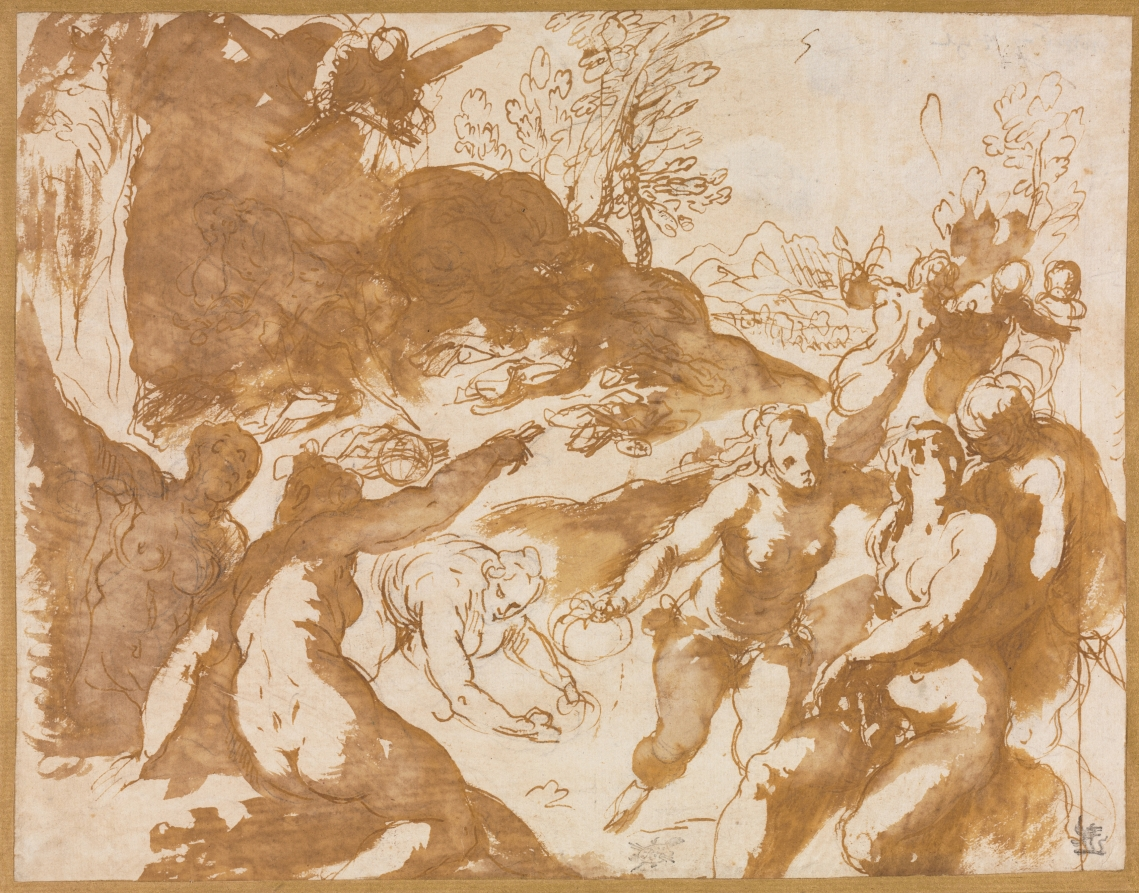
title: Apollo and the Muses Awakened by the Call of Fame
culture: Italy, 16th century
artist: Jacopo Palma il Giovane (Italian, c. 1548–1628)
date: 1590s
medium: pen and brown ink and brush and brown wash over graphite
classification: Drawing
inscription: RECTO OF SECONDARY SUPPORT, lower center, in brown ink: Palma giovan . ; VERSO OF SECONDARY SUPPORT, lower center, in graphite: Ex Coll: Jonathan Richardson ; lower center, in graphite: 23 [circled]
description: Here a barely visible Apollo, sleeping in the upper left background, and the nine muses are roused by the allegorical figure of Fame, who flies overhead with a trumpet. This dynamic scene signifies a reawakening of the arts. The loosely arranged clusters of figures and natural forms also suggest a harmonious relationship between humanity and the environment. This drawing, with its heavily subdued details and attention to the overall impact of contrast and design, is characteristic of Venetian draftsmanship in the late 1500s, and was valued by the small circle of Venetian intellectuals for whom Palma produced many similar mythological works.